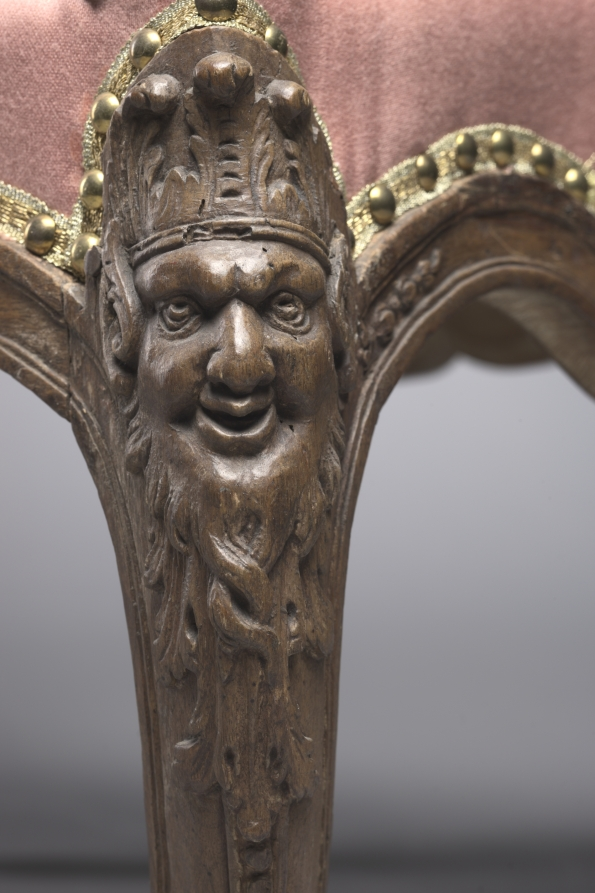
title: Armchair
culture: France, 18th century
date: c. 1715–1723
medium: oak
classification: Furniture and woodwork